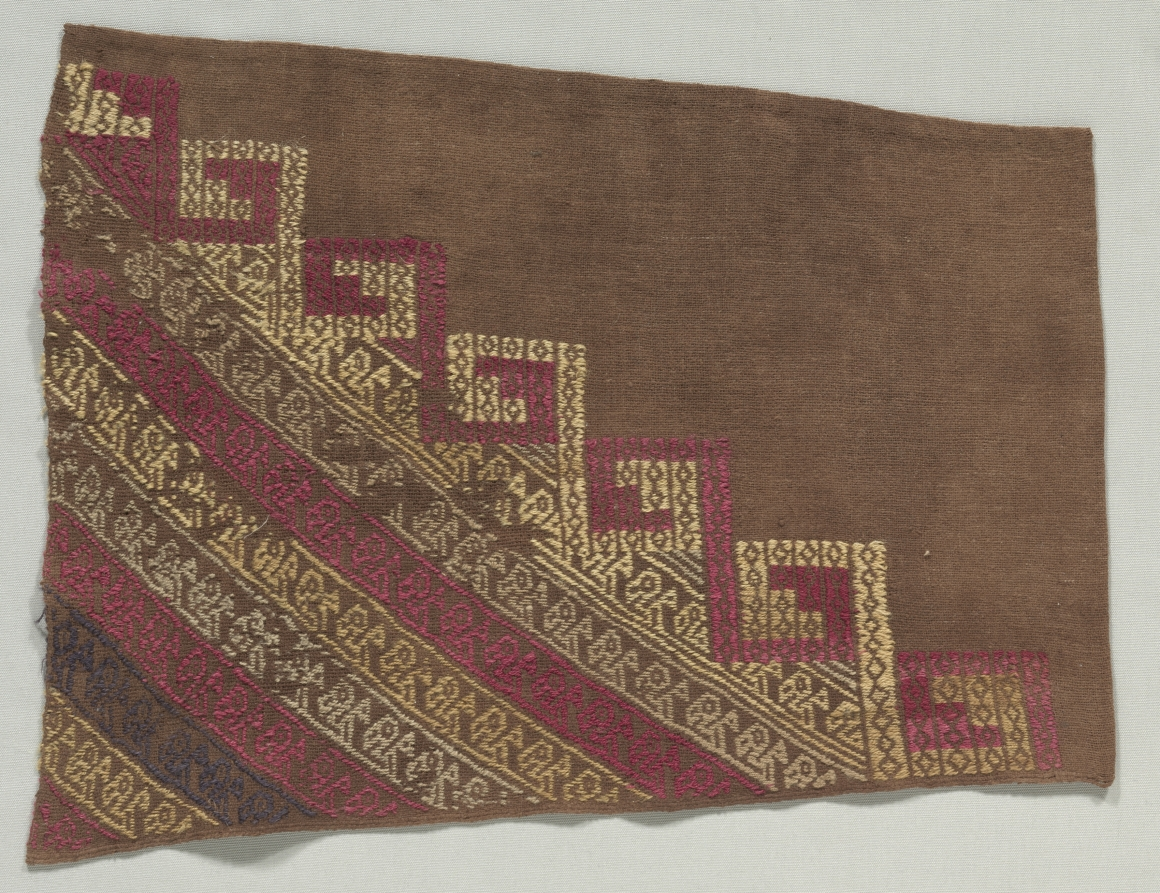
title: Fragment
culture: Peru, Central Coast, Chancay, 12th-15th century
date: c. 1100–1400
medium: tabby, brocaded; cotton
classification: Textile